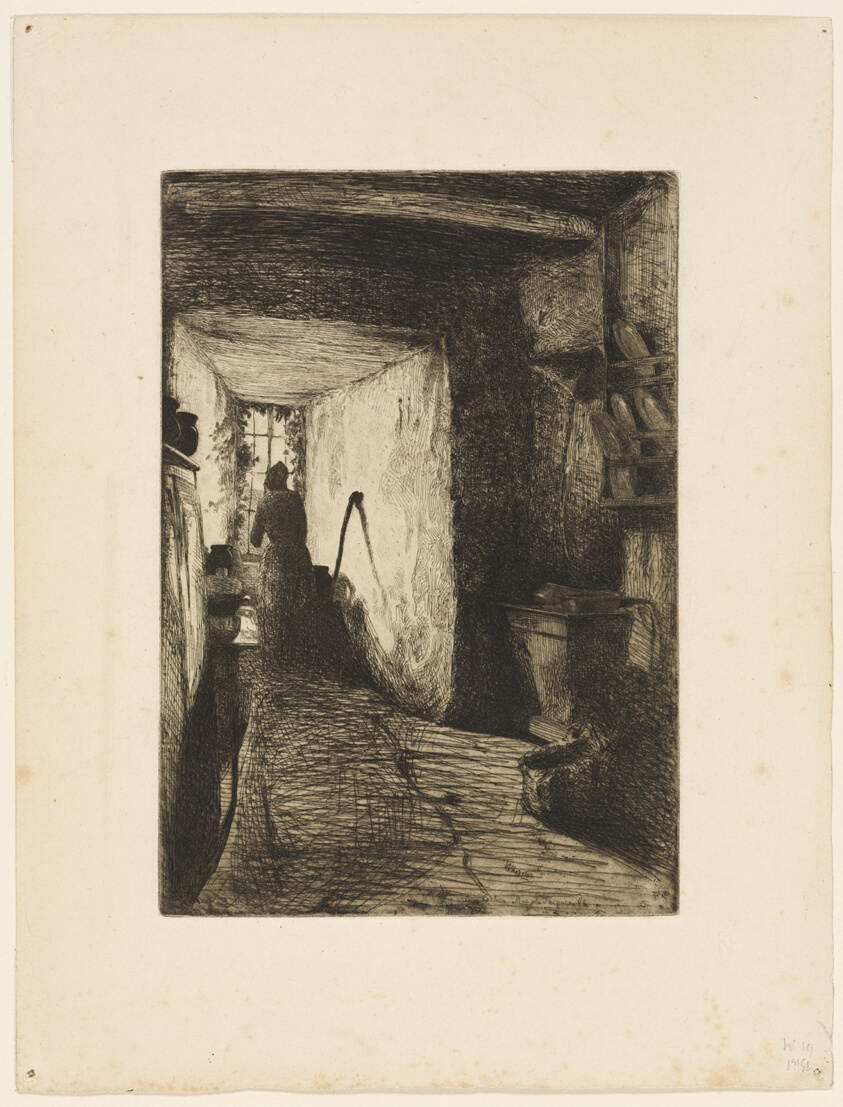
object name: Print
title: The Kitchen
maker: James McNeill Whistler (American, 1834-1903)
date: 1858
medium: Etching in black ink with foul biting on off-white China paper laid down on ivory wove paper (chine collé)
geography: United States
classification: etching; foul biting; print; prints and drawing; paper